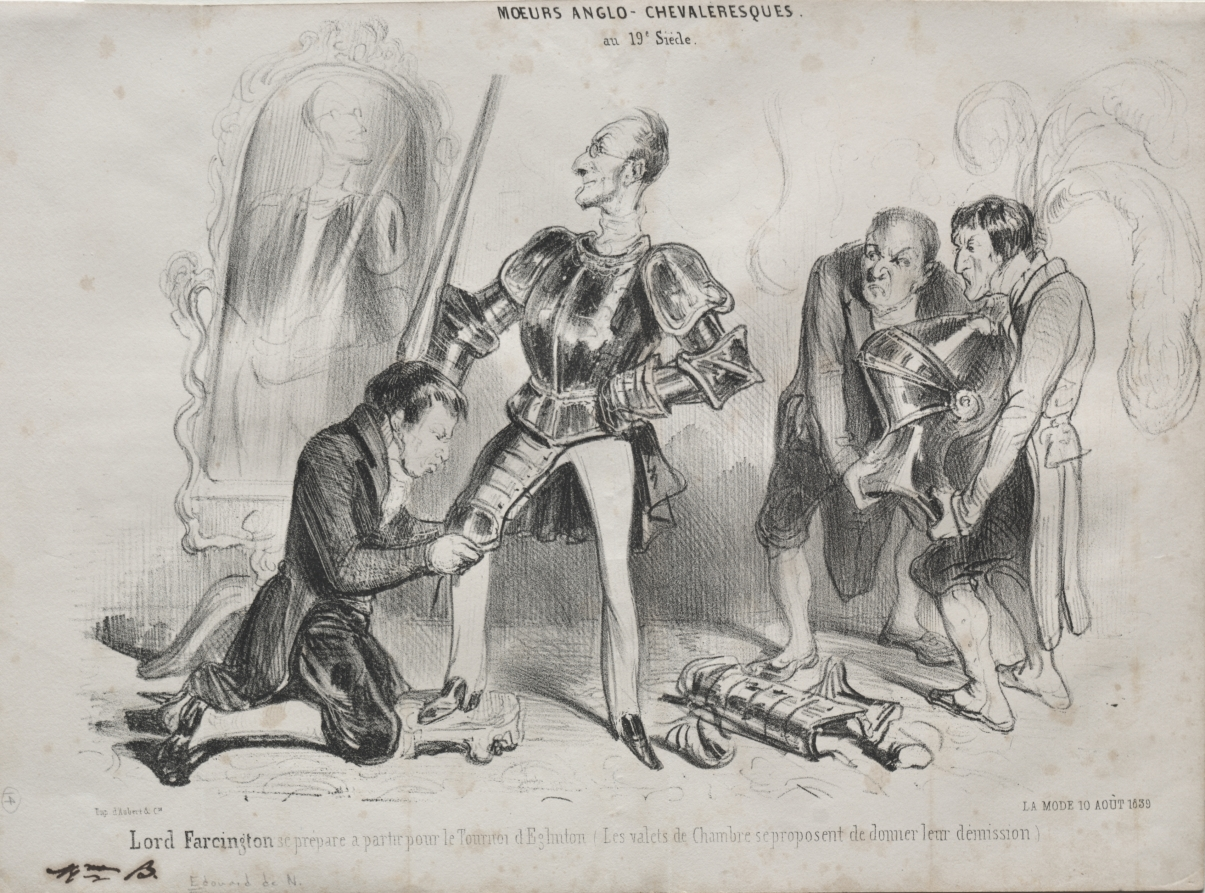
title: Moeurs Anglo-chevaleresques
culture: France, 19th century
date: 1839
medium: lithograph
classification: Print